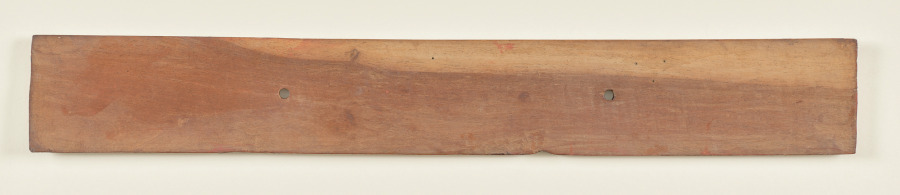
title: Top Cover for a Buddhist Manuscript (verso)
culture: Sri Lanka, Singhalese, Late 17th century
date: c. 1700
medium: Gum tempera on wood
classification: Manuscript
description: Palm leaf material is still used for manuscripts in Sri Lanka. The palm leaves are prepared first by boiling them, drying them in the sun, and then rubbing them with oils. Scribes then use a metal stylus to incise the text. Then charcoal powder is wiped across the pages, filling in only the inscribed lines.